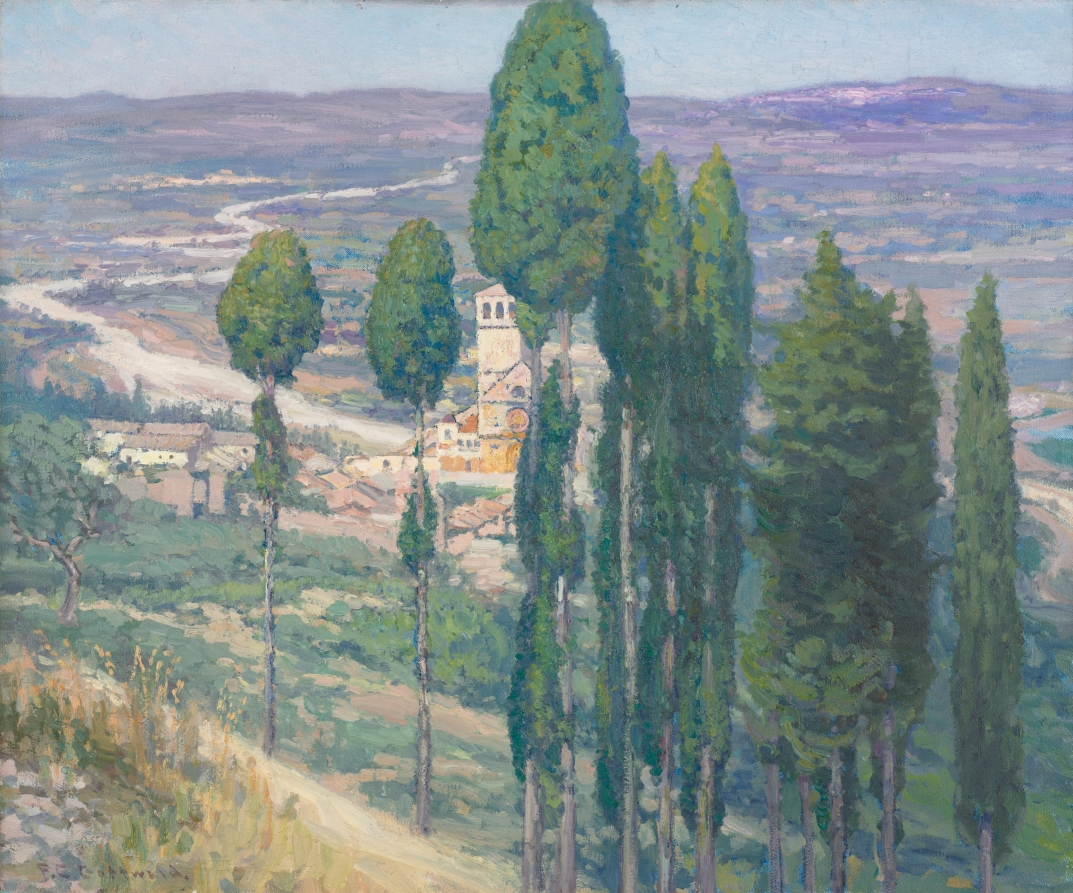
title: The Umbrian Valley, Italy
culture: America, Ohio, Cleveland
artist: Frederick Gottwald (American, born Austria, 1860–1941)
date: 1914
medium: oil on canvas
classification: Painting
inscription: signed lower left: F. C. Gottwald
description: Munich-trained Frederick Gottwald taught for more than four decades at the Cleveland School (now Institute) of Art, and was the most influential figure in the city’s burgeoning artistic development. During the years leading up to World War I, he spent summers in Italy, where he created this work.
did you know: This was the first painting by a living artist acquired by the Cleveland Museum of Art.